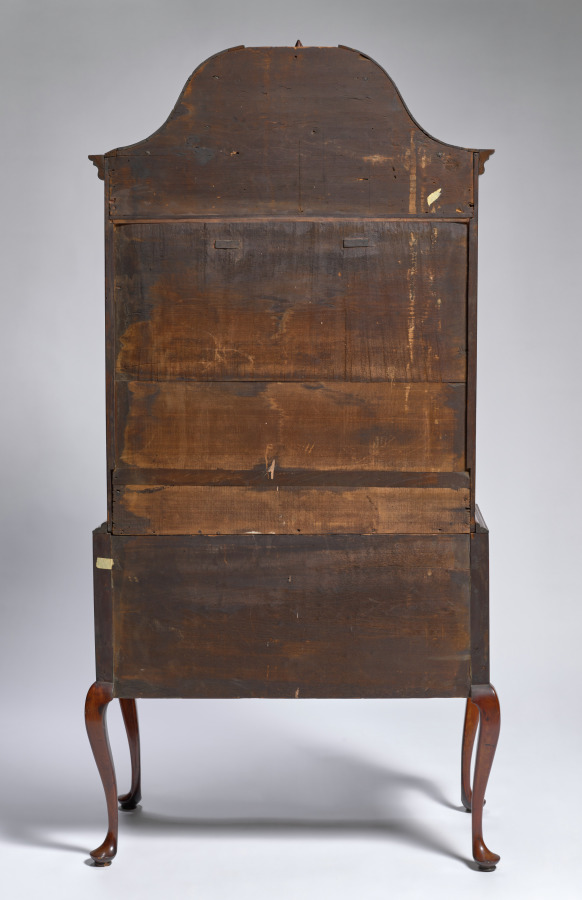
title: High Chest of Drawers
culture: America, Connecticut, 18th century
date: c. 1770–1785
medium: cherry and pine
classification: Furniture and woodwork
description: The style of this chest, generally termed Queen Anne, was introduced into American furniture from England in the first half of the 18th century. Connecticut, however, was a bit behind the times, so this gracefully designed piece was probably made at the time of the Revolution, or slightly later. The chest also features some technical details typical of furniture from this region. It is made of cherry wood that was stained dark. Its surface was also patterned to look like the wood graining of mahogany, the expensive tropical wood that was used when pieces such as this were made in metropolitan centers like Boston or New York.